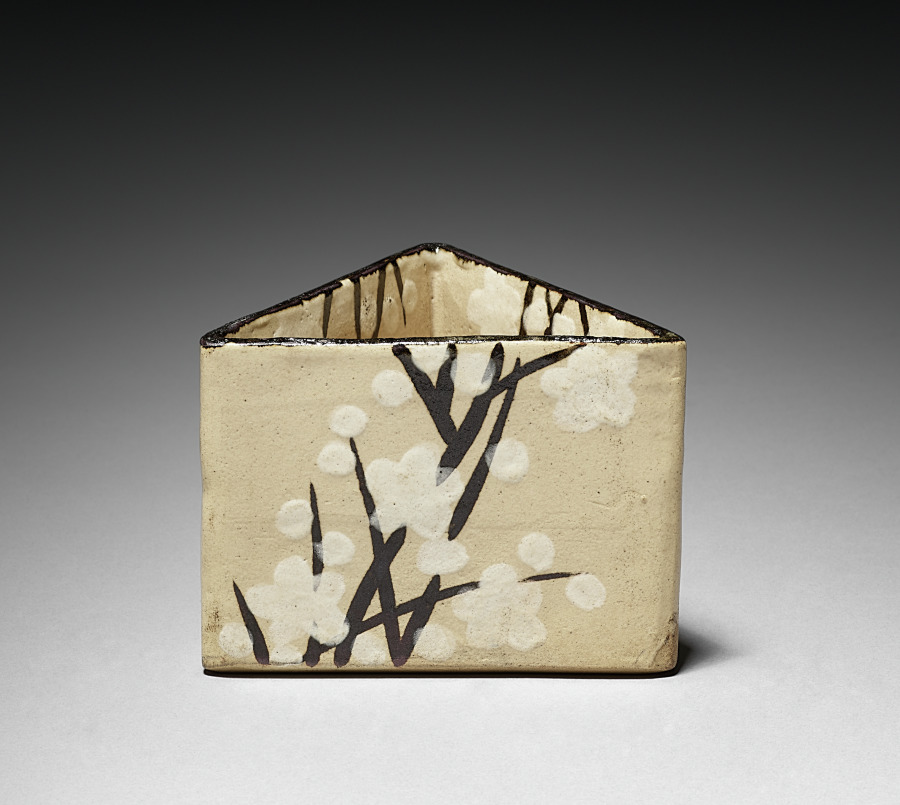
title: One of Five Serving Bowls (Mukozuke) with Prunus Design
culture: Japan, Edo period (1615–1868)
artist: school of Ogata Kenzan (Japanese, 1663–1743)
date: 1700s-1800s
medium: Kyoto Ware: stoneware with underglaze iron oxide and slip decoration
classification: Ceramic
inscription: signature on bottom, 3 characters in brown iron.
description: Note the rough, tan, clay bodies of these bowls with their deliberate irregularities. The design of branches was first painted in a black iron oxide, then the blossoms and buds in a white slip, followed by the application of a very thin transparent overglaze.